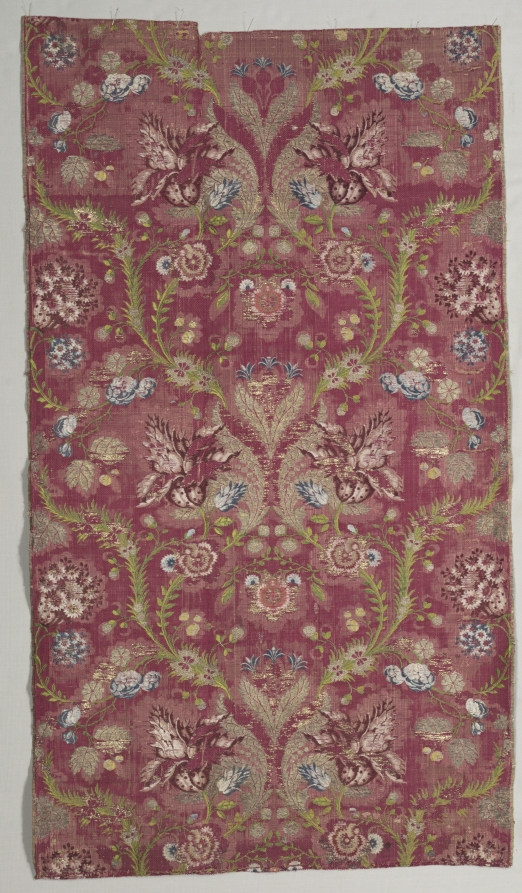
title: Brocade Textile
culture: Spain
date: 1700s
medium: brocade; silk and gold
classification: Textile